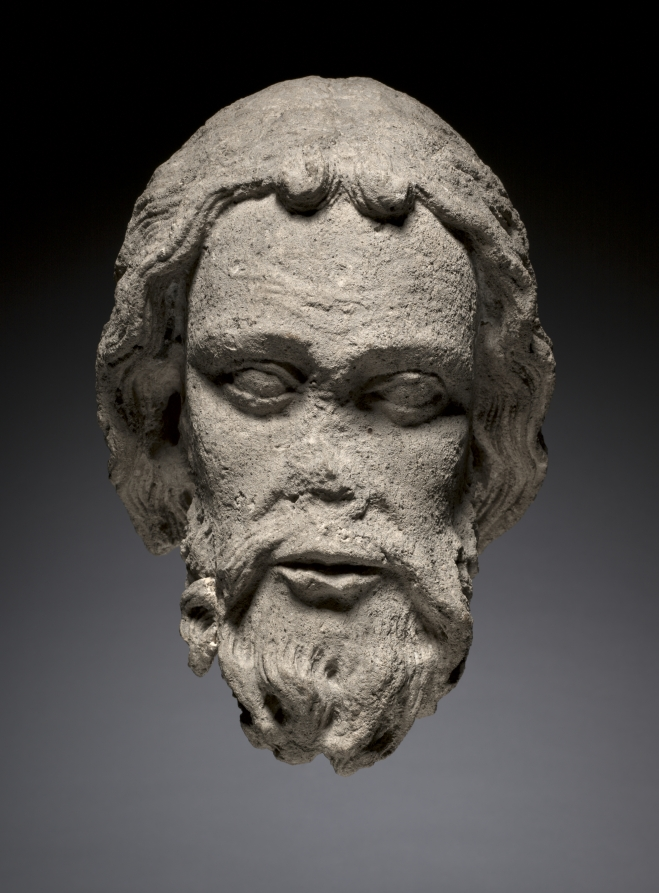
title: Head of an Apostle from the South Portal of the Cathedral of Thérouanne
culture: Northern France (Pas-de-Calais), Thérouanne, 13th century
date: c. 1235–1240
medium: oolitic limestone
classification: Sculpture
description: These monumental stone heads are among the substantial known remains of the sculptural program of Thérouanne’s cathedral, which was razed by Emperor Charles V of Spain in June 1553. These heads were found in a wall of rue Ste. Croix in the town of Saint Omer (a short distance to the north) in January 1923. This group of sculptures from the gable of the south portal of Thérouanne, which includes a stylistically related Christ as Judge, is recorded to have been moved to the Cathedral of Saint Omer in 1554. With their deeply carved wavy hair, curly beards, wrinkled foreheads, and ponderous facial features, these imposing heads—even in their now fragmentary and weathered state—attest to the powerful monumentality of the stone sculpture covering French church facades of the Gothic period.